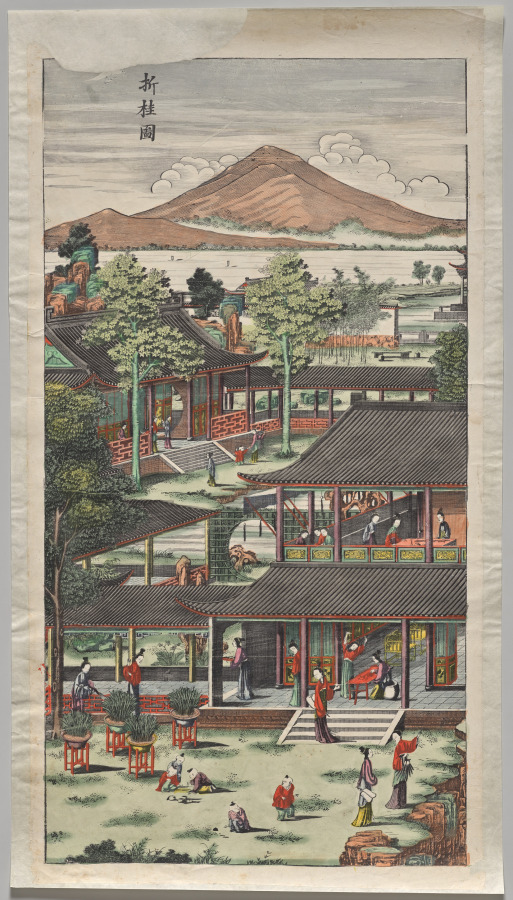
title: Gathering Osmanthus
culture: China, Qing dynasty (1644–1911), Qianlong reign (1736–95)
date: 1736–95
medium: Polychrome woodblock print; ink and color on paper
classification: Print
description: In the 1600s, printing flourished in such Jiangnan cities as Nanjing, Suzhou, Hangzhou, and Huizhou, evolving from privately enjoyed illustrated books printed in color to more commercialized single-sheet color prints that were hung on walls and became part of the rich urban visual culture.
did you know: Woodblock printing in color reached a height in China in the 1600s to 1700s. The prints were executed by means of sets of separate blocks, each carved to print a different color.